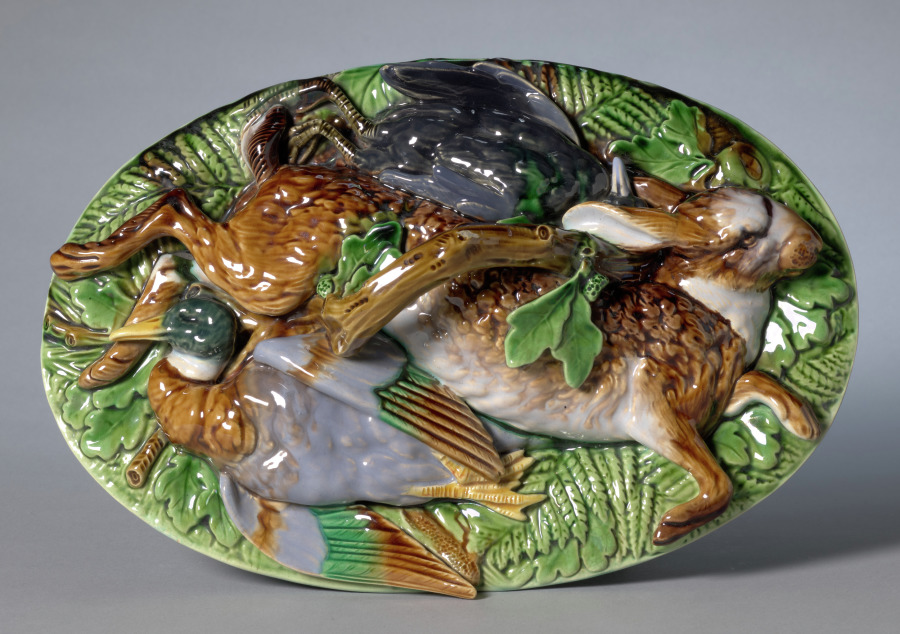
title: Game Pie Dish (Lid)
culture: England, 19th century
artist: Minton Pottery and Porcelain Factory (British)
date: c. 1860–80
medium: earthenware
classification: Ceramic